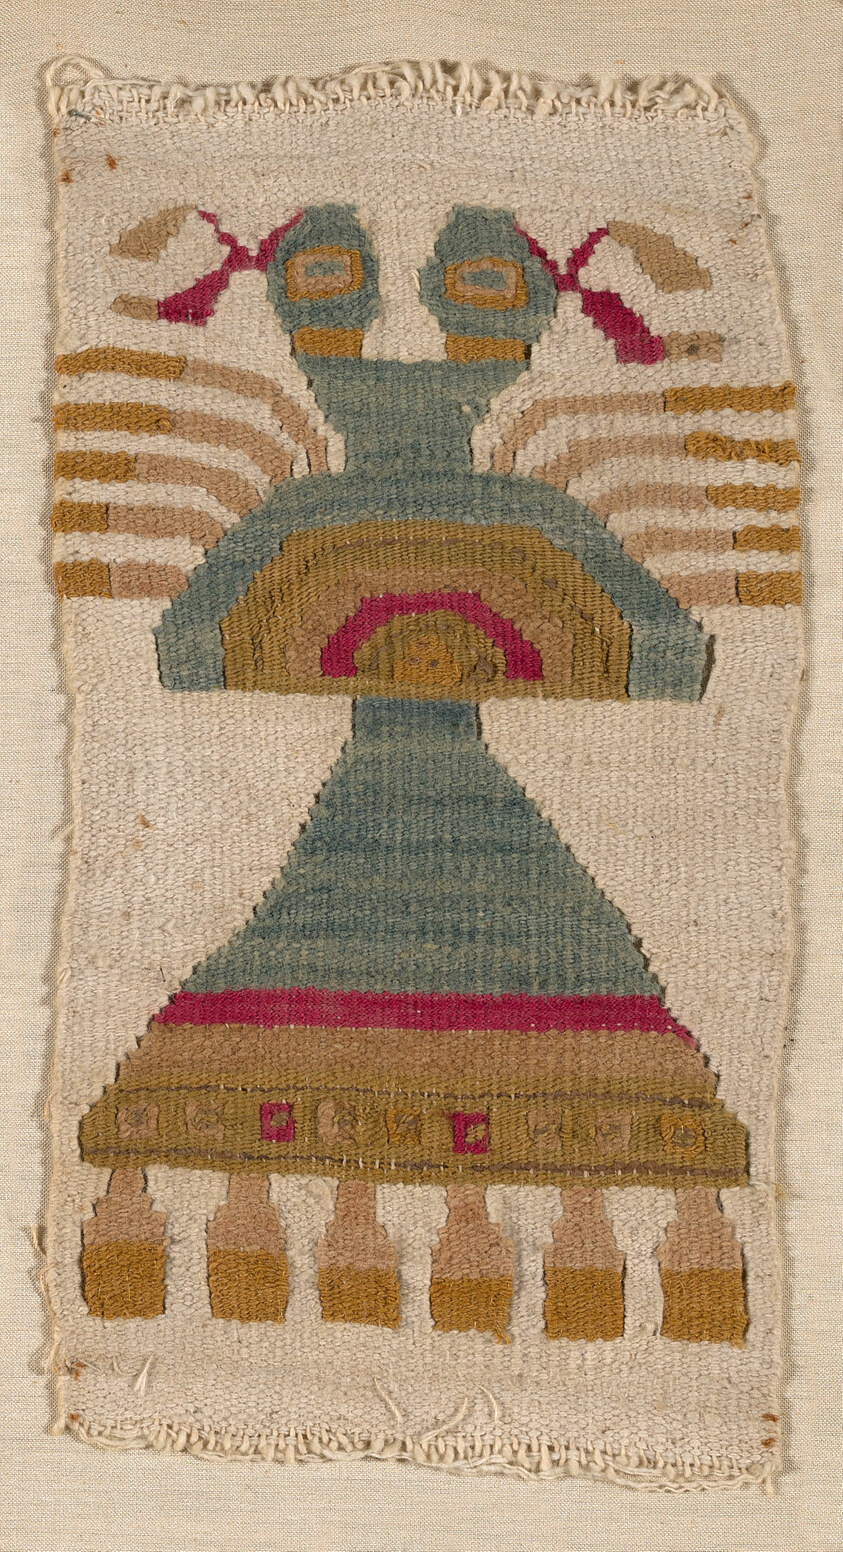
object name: Textile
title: Patch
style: lambayeque, Pre-Columbian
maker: Lambayeque (North coast, Peru)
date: 1000/1476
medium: Cotton and wool (camelid), slit tapestry weave with eccentric wefts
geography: Peru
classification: textile; weaving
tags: birds, animals, super/natural